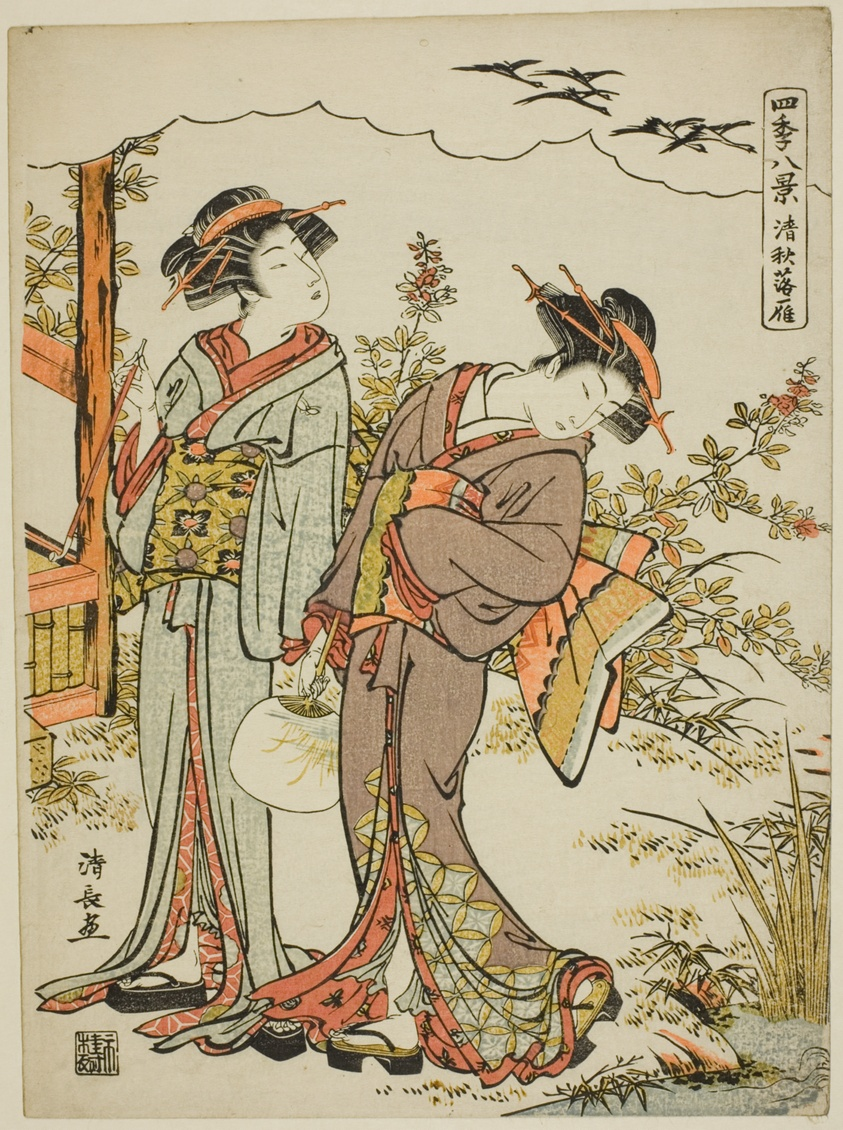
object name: Print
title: Geese Descending in Mid Autumn (Seishu no rakugan), from the series "Eight Scenes of the Four Seasons (Shiki hakkei)"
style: Japanese (culture or style)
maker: Torii Kiyonaga (Japanese, 1752-1815)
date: c. 1779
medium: Color woodblock print; chuban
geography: Japan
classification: woodblock print; print; asian art